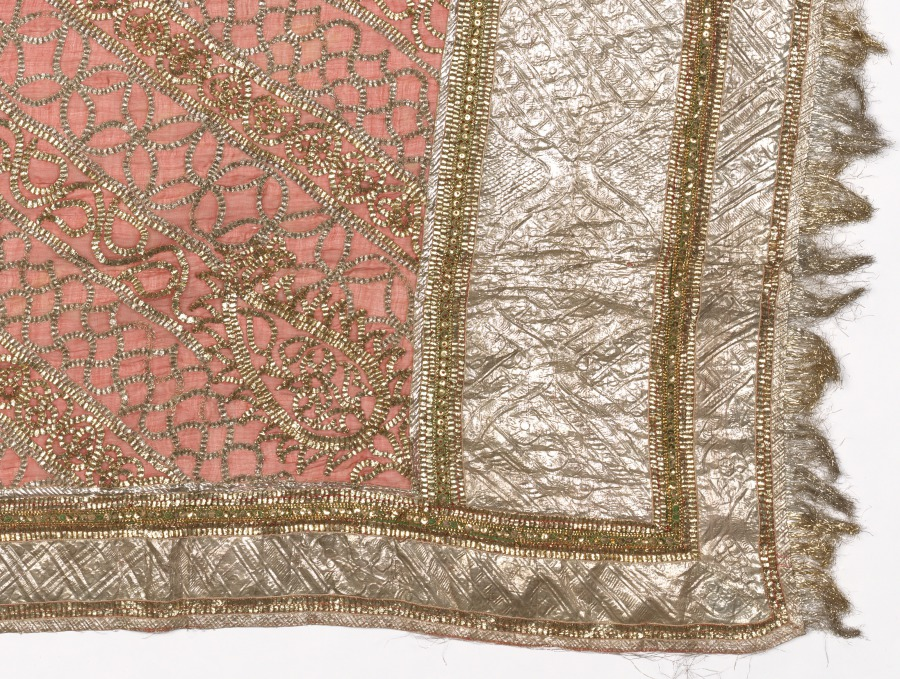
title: Embroidered Sari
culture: India, Patna, 19th - early 20th century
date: 1800s - early 1900s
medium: embroidery; silk and metal thread and sequins on cotton tabby ground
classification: Embroidery